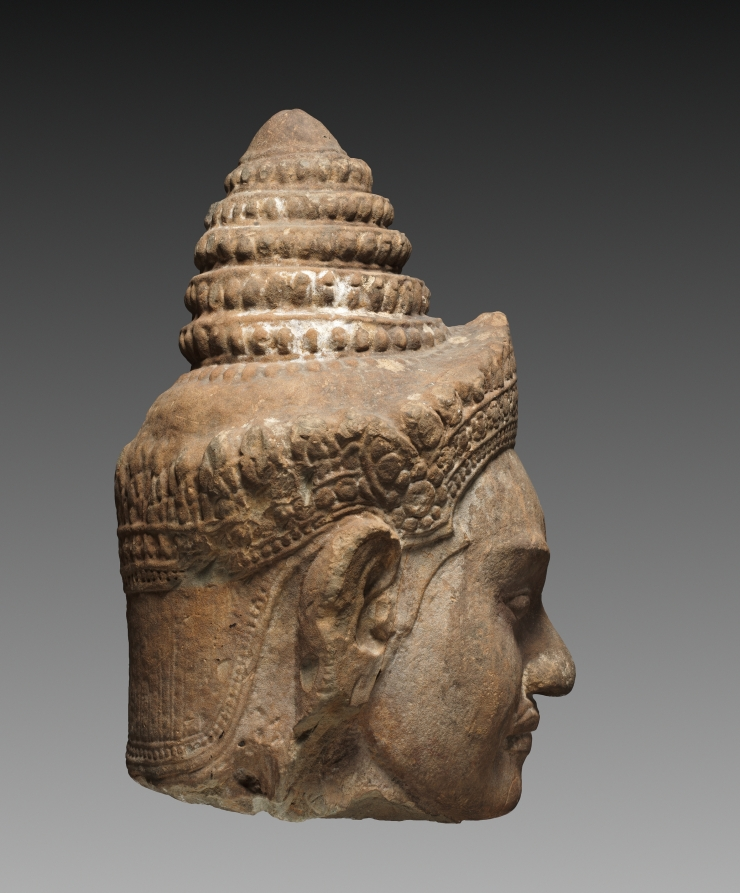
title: Colossal Head of a Deva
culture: Cambodia, Angkor, Preah Khan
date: c. 1200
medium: sandstone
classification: Stone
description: This head is from one of the gods (devas in Sanskrit) who, according to Hindu myth, churned the primordial Ocean of Milk to extract the nectar of immortality. Using a mountain as a churning rod and a serpent as the rope, the gods on one side and the demons on the other vied to win the nectar. The gods prevailed and achieved immortality.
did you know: The deity’s conical tiara consists of a diadem with floral decoration and is topped by a five-tiered lotus narrowing upward.